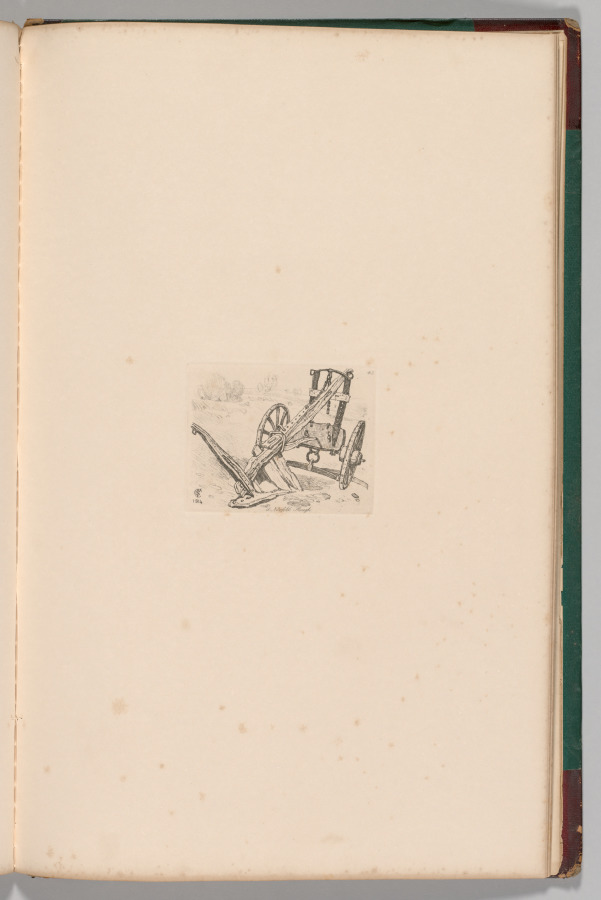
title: Liber Studiorum: Plate 43, A Norfolk Plough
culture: England, 19th century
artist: John Sell Cotman (British, 1782–1842)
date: 1814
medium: softground etching, from a bound volume containing 48 plates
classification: Bound Volume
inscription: In plate, within image, upper right: 43; in plate, lower left, within image, monogram: S inside a C with a line down the center above 1814; in plate, center, within image: A Norfolk Plough